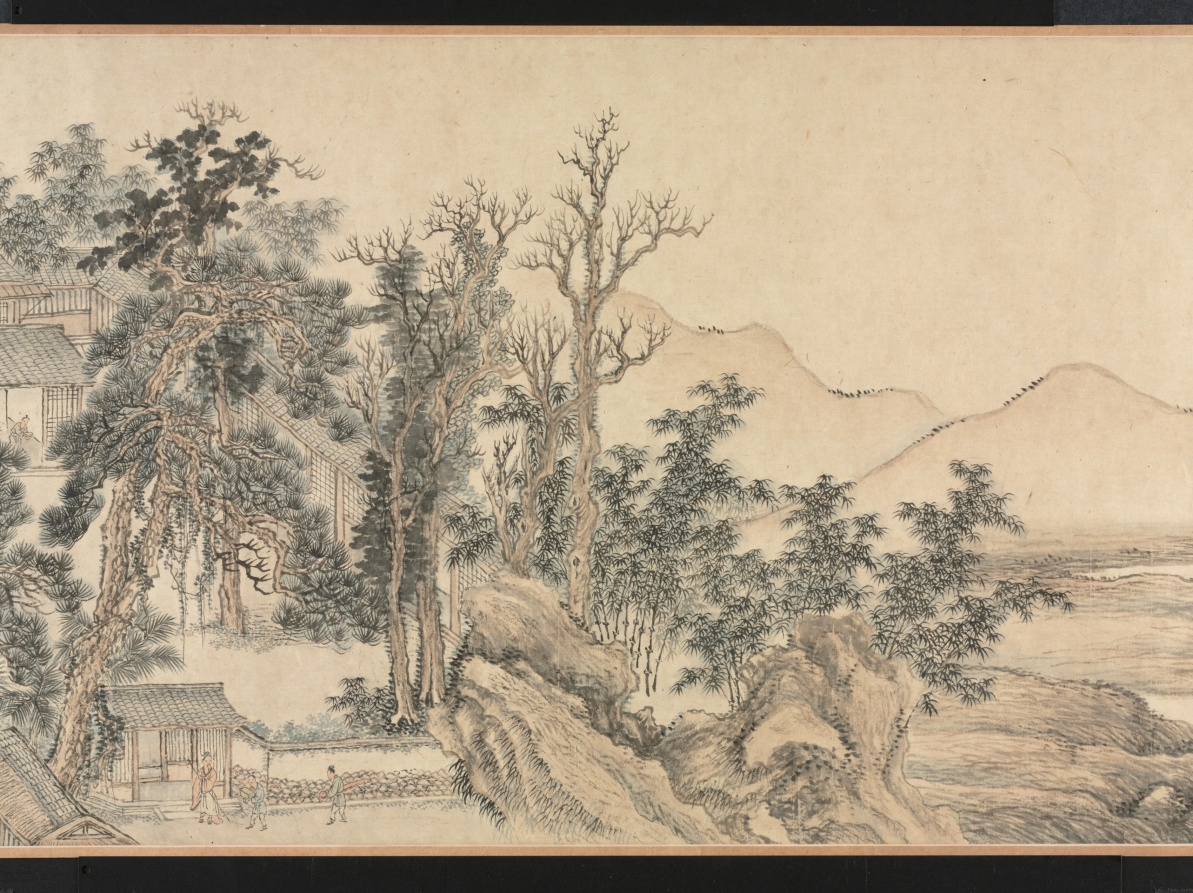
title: Hall of Lofty Pines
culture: China, Qing dynasty (1644-1911)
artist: Wang Hui (Chinese, 1632–1717)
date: 1703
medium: handscroll; ink and color on paper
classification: Painting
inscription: [題] 松喬堂圖 康熙癸未夏六月, 海虞耕煙散人王翬畫。[印]王翬之印; 石谷. [左下] 來青閣; 耕煙野老時年七十有二.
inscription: 松喬堂圖一卷，海虞石谷王君為靜海近公厲少司冦公作也。圖成于癸未之夏。未幾而公遂仙去。公令子今編修君南湖屬余題跋其後。余與公同官侍從，交契最深。側見公之清修純德，蔚為聖天子所眷重。侍直內廷，密勿贊襄，幾二十餘年。蒼生之所以受賜，士林之所以沐德者，天下莫能窺，在廷莫能悉。而公卒不言。以故宸衷日益契，恩禮亦日益渥。雖年逾懸車，時有歸老之念。而上固不聼公之去。其所謂松喬堂者，御書以賜公者也。蓋以松比公之清風勁節，而歲寒不改，經霜彌茂。則又以期公之壽考未有艾焉。公知此身未易乞，而山林槃磵之樂，止可寄諸寤思。此松喬堂圖之所由作也歟。石谷此圖，結構精密，筆墨超邁。其寫樹木之蒼蔚，堂宇之靚幽。恍見摩詰輞川樂天廬山之勝。獨惜公未得一日徜徉故園以償其願。即繪於圖亦未得以永其趣，此編修君之所以眷眷不忘也。雖然千歳之松喬，下蔭百畝，上以修棟梁之需。然則上當日名堂之意，不更望於後之人襲其芘而養其材也哉。吾願編修君之寶斯圖。并望君之塗塈丹雘，大其堂構也已矣。 康熈丙戍重陽三日，雲間王鴻緒跋。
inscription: 10 additional seals: 1 seal of Li Duna 勵杜納 (1628–1703); 4 seals of Zha Ying 查瑩 (jinshi of 1766); 5 seals of Li Yun (dates unknown).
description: Wang Hui 王翬, a leading painter in the orthodox school of the early Qing dynasty (1644–1911), was commissioned to paint this landscape with a country estate for Li Duna 勵杜納 (1628–1703), vice minister of justice in Emperor Kangxi’s court. The emperor had honored Li by granting him a piece of calligraphy with the name of Li’s retirement retreat, “Hall of Lofty Pines.” He drew a comparison between pines and Li’s upright character, resilience, and longevity. Wang Hui’s painting was supposed to allow Li to imagine living in a beautiful, secluded compound among the hills and pines. Sadly, Li died before seeing the completed painting and before receiving the emperor’s permission to retire. The landscape begins with peaceful riverbanks and low hills. The pines around the estate in the middle of the handscroll are truly lofty, some stretching even beyond the frame of the painting. Li Duna, the estate’s owner, is shown twice in his serene mountain retreat: first approaching the entrance to the compound with two servants at the right, and then later in the scroll, to the left, reading in the comfort of an inner room.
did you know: One servant carries the estate owner's carefully wrapped qin, a type of zither.